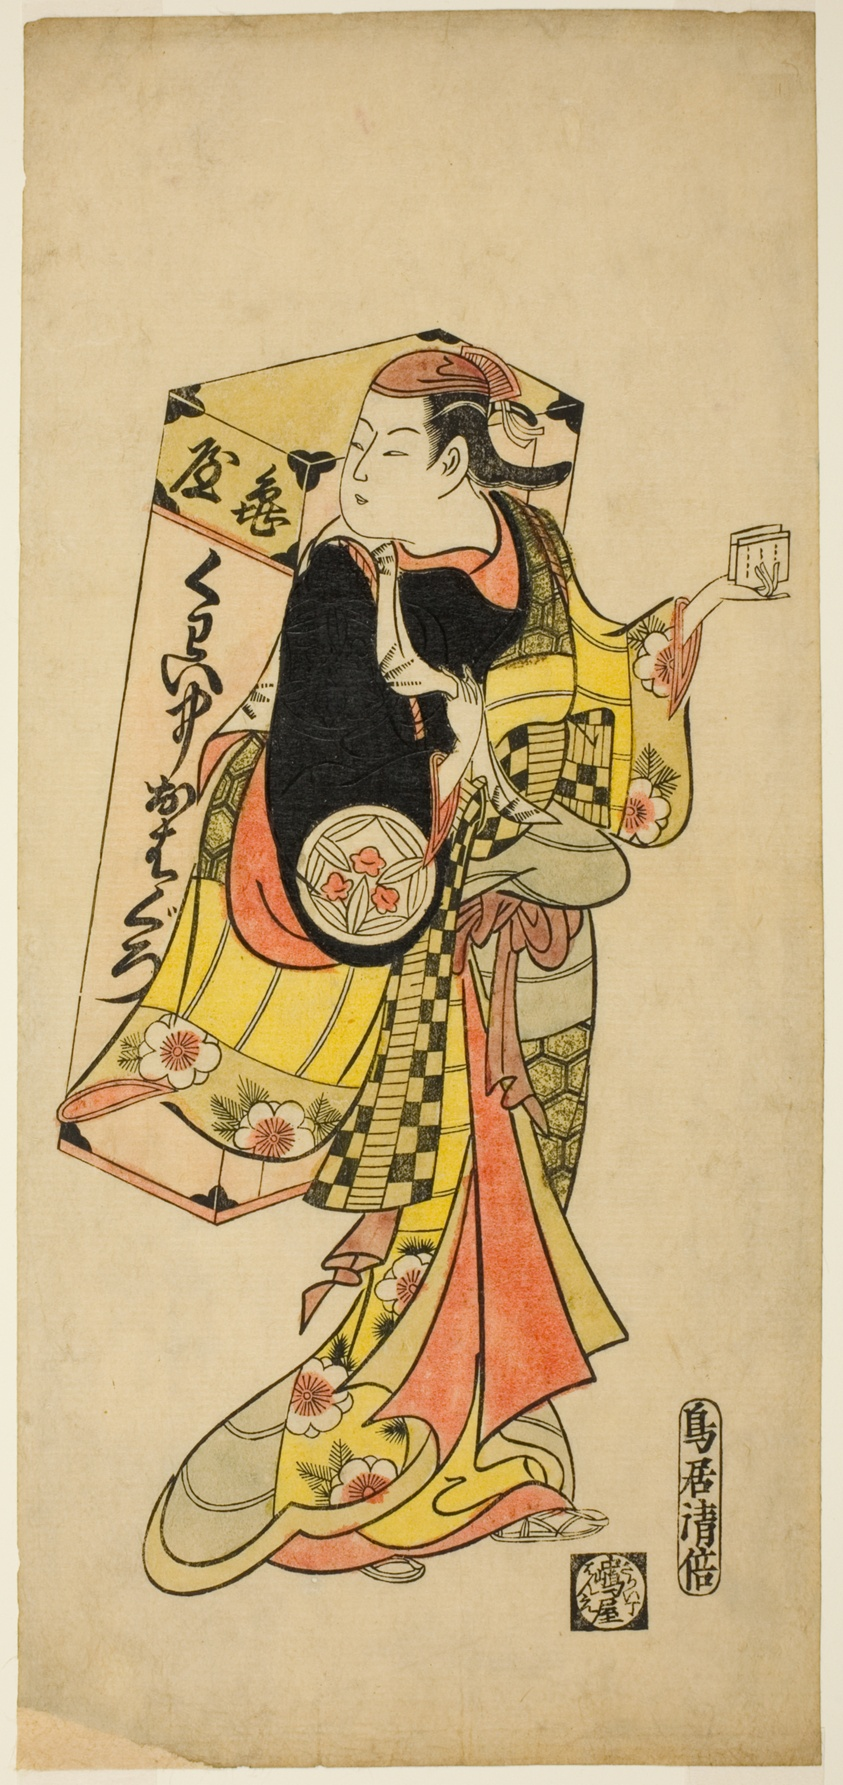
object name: Print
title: The Actor Yamashita Kinsaku I as a peddler of tooth-blackening dye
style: Japanese (culture or style)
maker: Torii Kiyomasu II (Japanese, 1706 (?)–1763 (?))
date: c. 1727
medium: Hand-colored woodblock print; hosoban, urushi-e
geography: Japan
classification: woodblock print; print; asian art